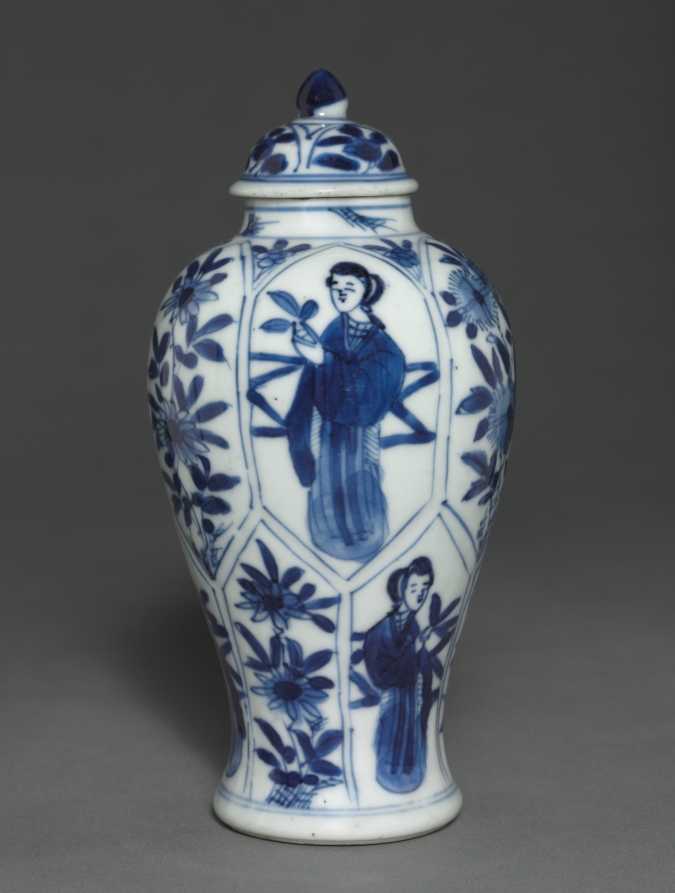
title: Jar with Cover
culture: China, Qing dynasty (1644-1911)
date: 19th Century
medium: porcelain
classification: Ceramic